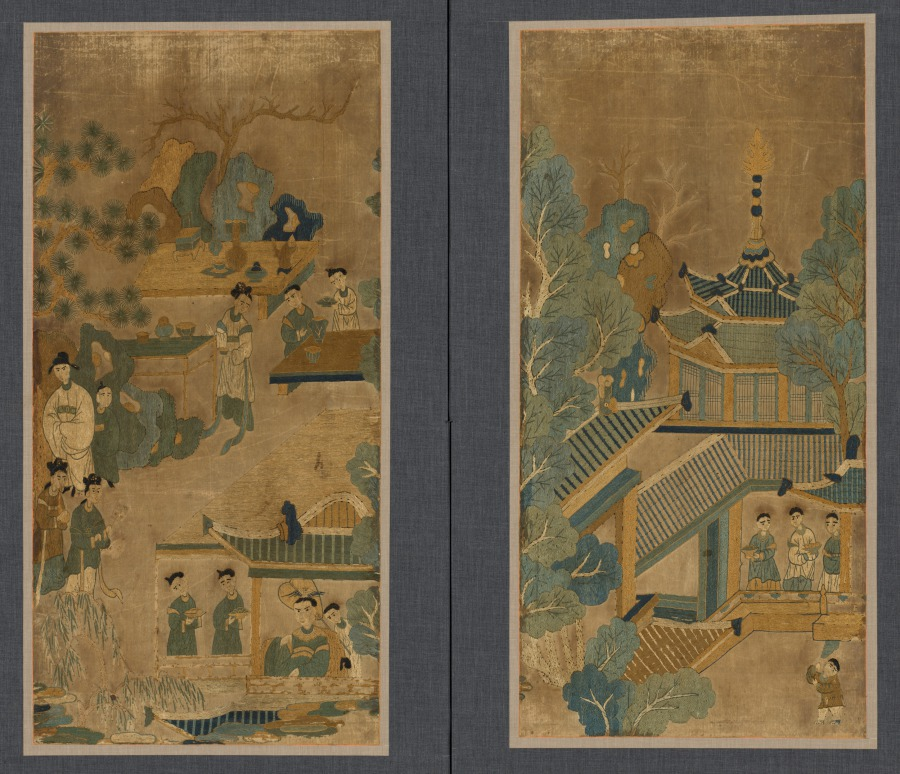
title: General Guo Ziyi’s Birthday Banquet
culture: Korea, Joseon dynasty (1392–1910)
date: early or mid-1800s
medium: Eight-panel folding screen, embroidery on silk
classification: Textile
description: The subject of this folding screen is a banquet in honor of Guo Ziyi (697–781), who is considered one of the greatest generals in Chinese history. He had a long and successful military career as well as a blissful family life. Thus, his image surrounded by his numerous family members symbolize the paragon of success and happiness. Using a wide spectrum of colorful silk threads, the artist colorfully depicts Guo enjoying his full-fledged retirement life.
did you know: This folding screen is highly likely to have been created by an amateur woman embroiderer.